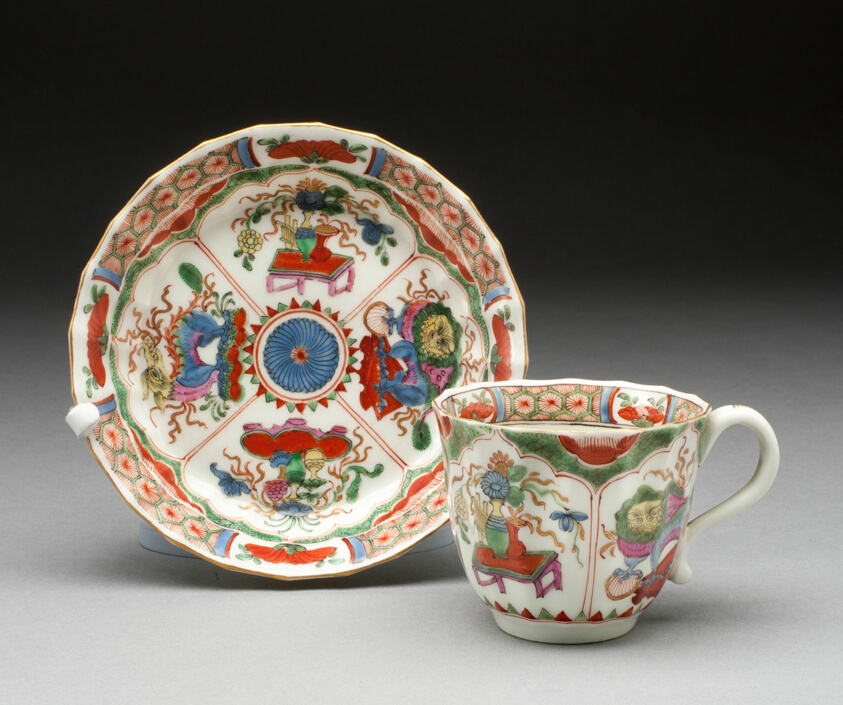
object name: Ceramics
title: Teacup and Saucer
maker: Worcester Porcelain Factory (Warmstry House Period, 1751–1783); Worcester, England, founded 1751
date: c. 1770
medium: Soft-paste porcelain, polychrome enamels and gilding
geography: Worcester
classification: drinking vessel; teaware; porcelain; european decorative arts; ceramics